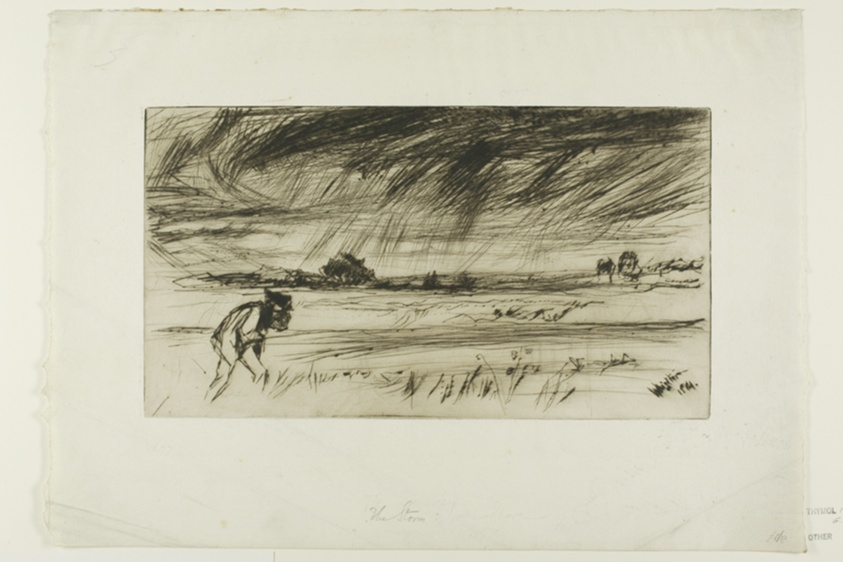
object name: Print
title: The Storm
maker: James McNeill Whistler (American, 1834-1903)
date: 1861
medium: Drypoint in dark brown ink on ivory laid paper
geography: United States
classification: drypoint; print; prints and drawing; paper